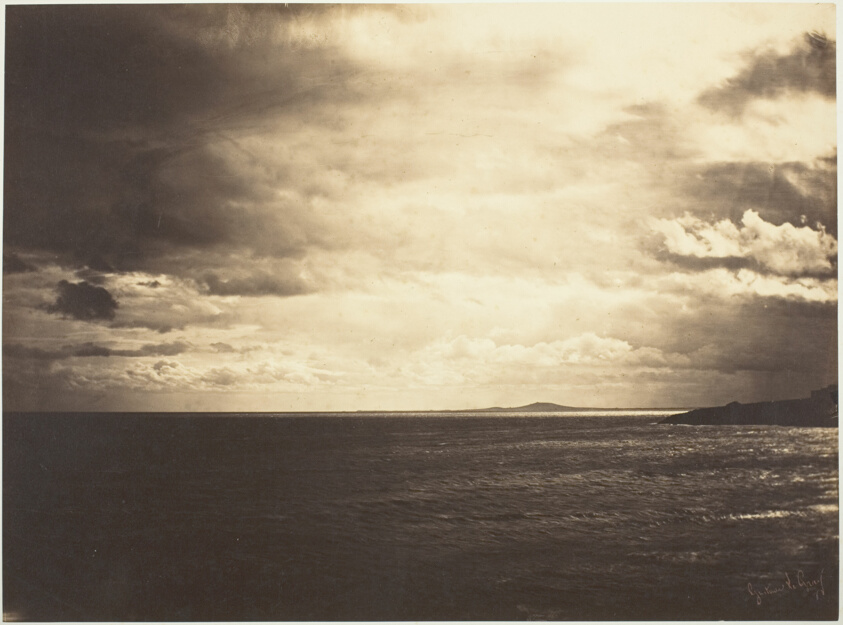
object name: Photograph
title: Cloudy Sky, Mediterranean Sea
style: 19th century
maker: Gustave Le Gray (French, 1820–1884)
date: 1857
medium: Albumen print, No. 16 from the album "Vistas del Mar"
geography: France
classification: albumen silver print; photographic process; photography; photograph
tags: Paris